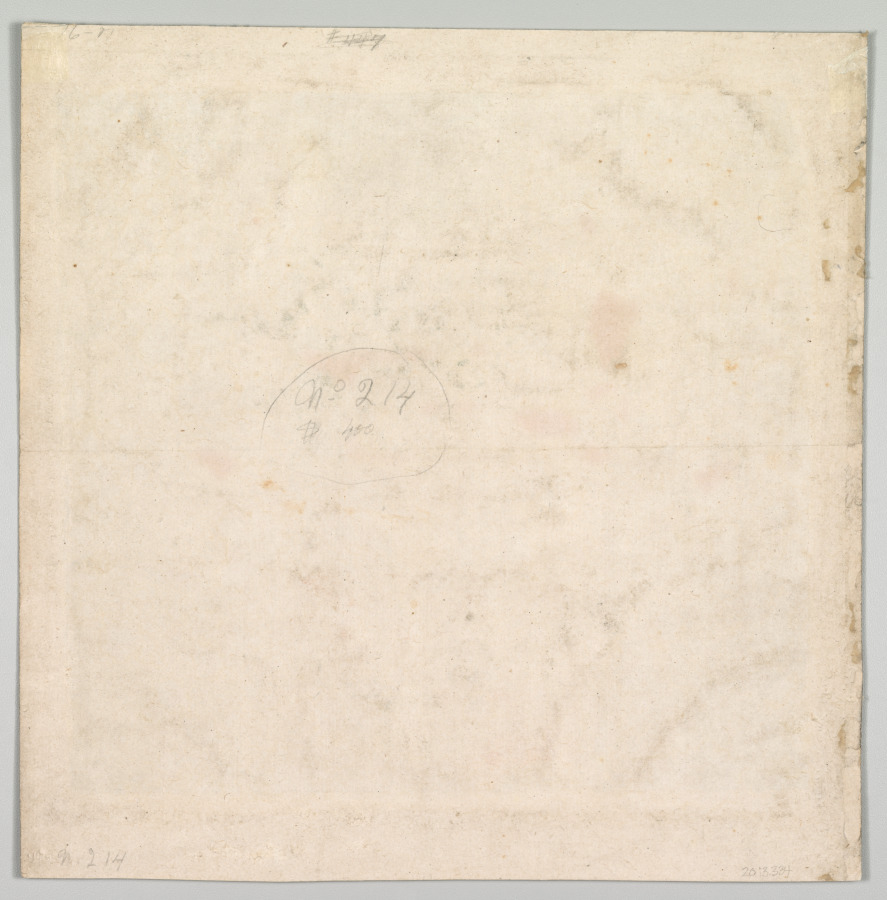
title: Husain Ali Khan Entertaining His Brothers (The Sayyid Brothers)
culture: India, Mughal Dynasty (1526-1756)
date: c. 1712–19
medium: Gum tempera, ink, and gold on paper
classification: Painting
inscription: Persian inscription at bottom, in nasta‘liq script: Portraits of Nawab Husayn-Ali Khan and Abdullah Khan and Najm al-Din Ali Khan and Fakhr al-Din Ali Khan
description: The shrewd imperial oligarch smoking the hookah and his brothers ran the Mughal government after the death of Emperor Alamgir in 1707 until the rise of Emperor Muhammad Shah in 1719. They were ruthless, self-serving kingmakers who caused the assassinations and accessions of six different members of the royal family to the Mughal throne in Delhi. The two attendants behind him exchange a worried glance, and the rare use of a flat gray sky behind the white marble terrace suggests the artist’s mood about the future strength and prosperity of the empire.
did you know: The man shown smoking a hookah is the Mughal imperial ruler.